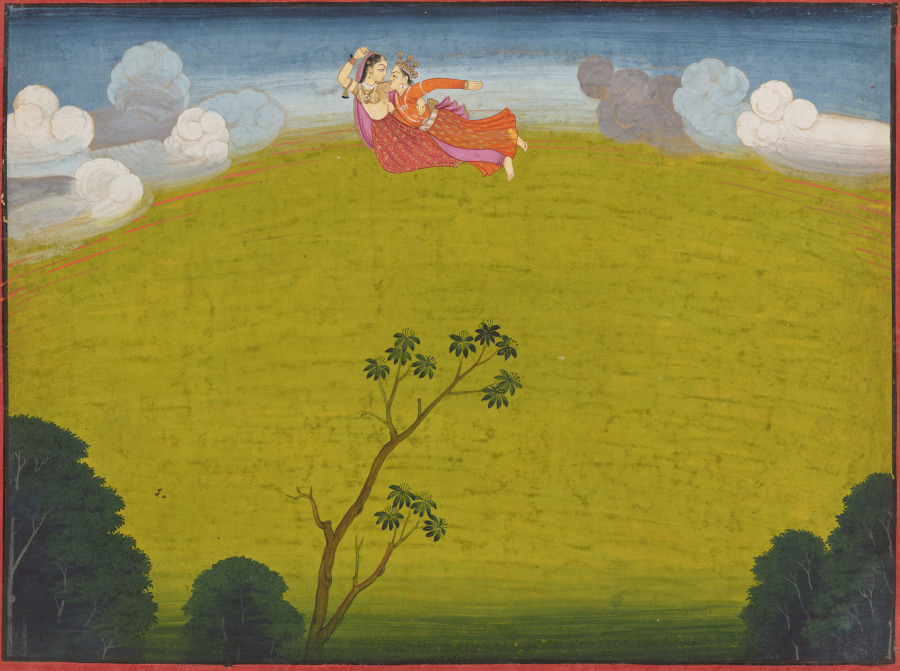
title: Pradyumna and Mayavati Fly to Dvaraka, from the Large Basohli Bhagavata Purana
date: c. 1760–65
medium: Gum tempera, ink, and gold on paper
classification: Painting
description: A goddess who can fly, Mayavati brings her lover Pradyumna to be reunited with his parents for the first time since he was an infant, when he was kidnapped by a demon who was her husband. Having just slain the demon, they can be together and return to the palace where he was born. Pradyumna is the son of Krishna, and also an incarnation of the god of love, Kama. Mayavati is an incarnation of Rati, the goddess of erotic love. Later, Pradyumna also marries his cousin Rukmavati.